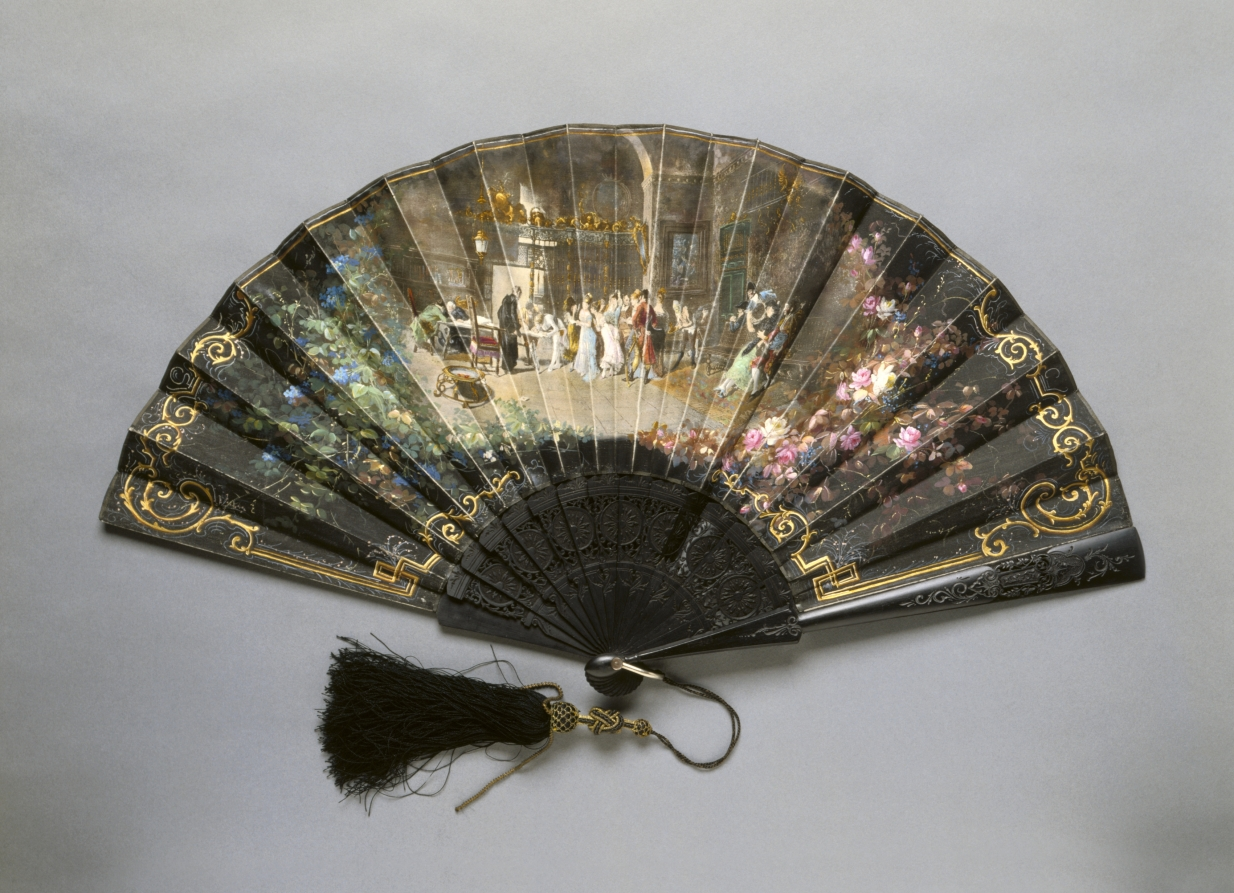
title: Fan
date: before 1915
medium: wood, metal threads, silk, pigment on silk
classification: Miscellaneous